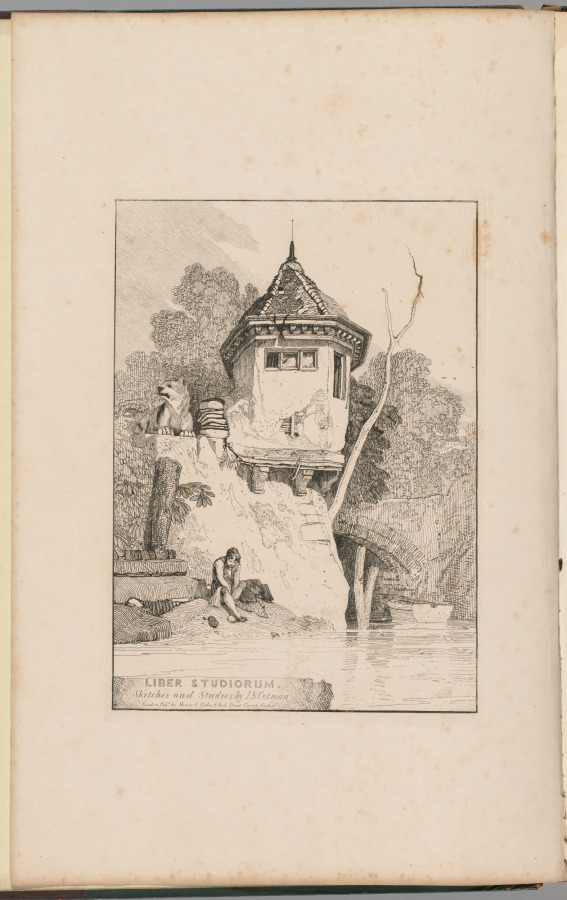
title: Liber Studiorum; Frontispiece, View of a Garden House on the Banks of the River Yare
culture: England, 19th century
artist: John Sell Cotman (British, 1782–1842)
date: 1838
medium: softground etching, from a bound volume containing 48 plates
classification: Bound Volume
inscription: On plate, within image, lower left: LIBER STUDIORUM. / Sketches and Studies by J. S. Cotman / London Pubd by Henry G. Bohn 4 York Street Covent Garden